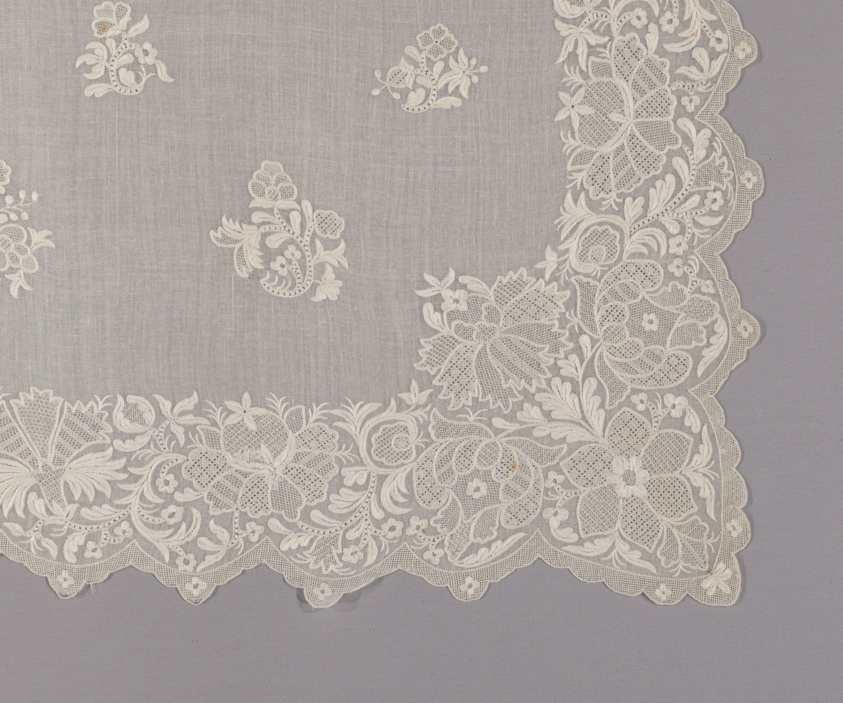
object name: Costume and Accessories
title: Apron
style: 18th Century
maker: England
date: 1760s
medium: Cotton, plain weave; drawnwork and embroidery in cotton, satin, buttonhole, chain, and double chain stitches with linen thread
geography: England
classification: textile; costume accessory; needlework (visual works); costume; dress (garment); clothing; apron (main garment); costume - embroidery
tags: flowers, floral patterns, floral, floral motifs